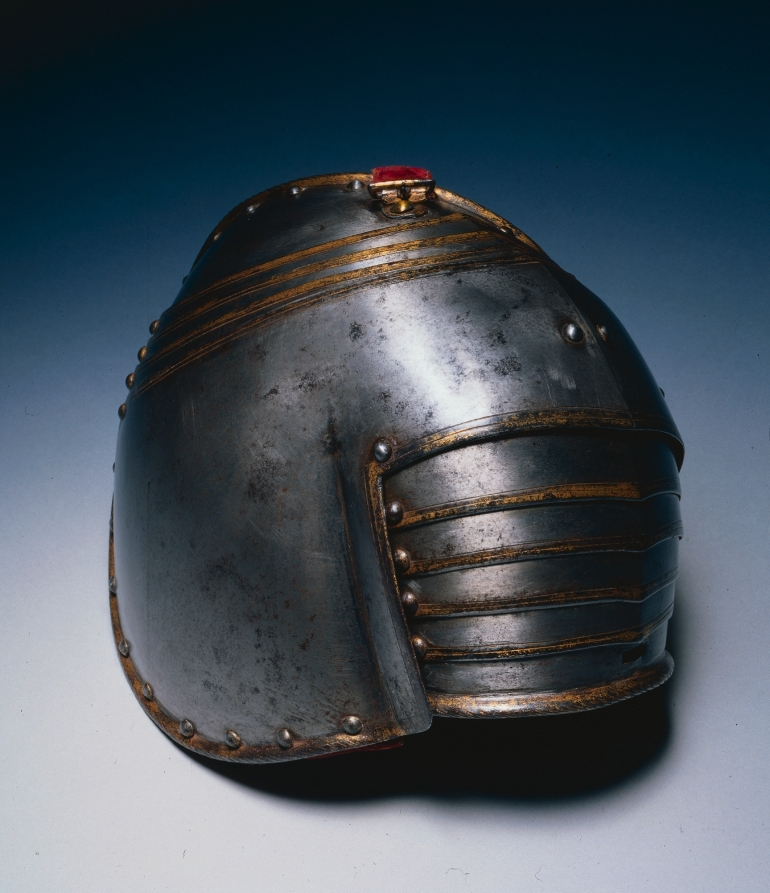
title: Pauldron for Right Shoulder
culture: Italy, 17th century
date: 1600s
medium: blued steel with gilt borders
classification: Arms and Armor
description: This element for the shoulder once belonged to a suit decorated by the bluing technique, a process of superheating armor plates to achieve a deep blue color. Gilding the borders created additional contrast for a refined appearance.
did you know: Bluing required heating to at least 590 degrees Fahrenheit, the temperature at which oxidation occurs and turns the metal a deep shade of blue.